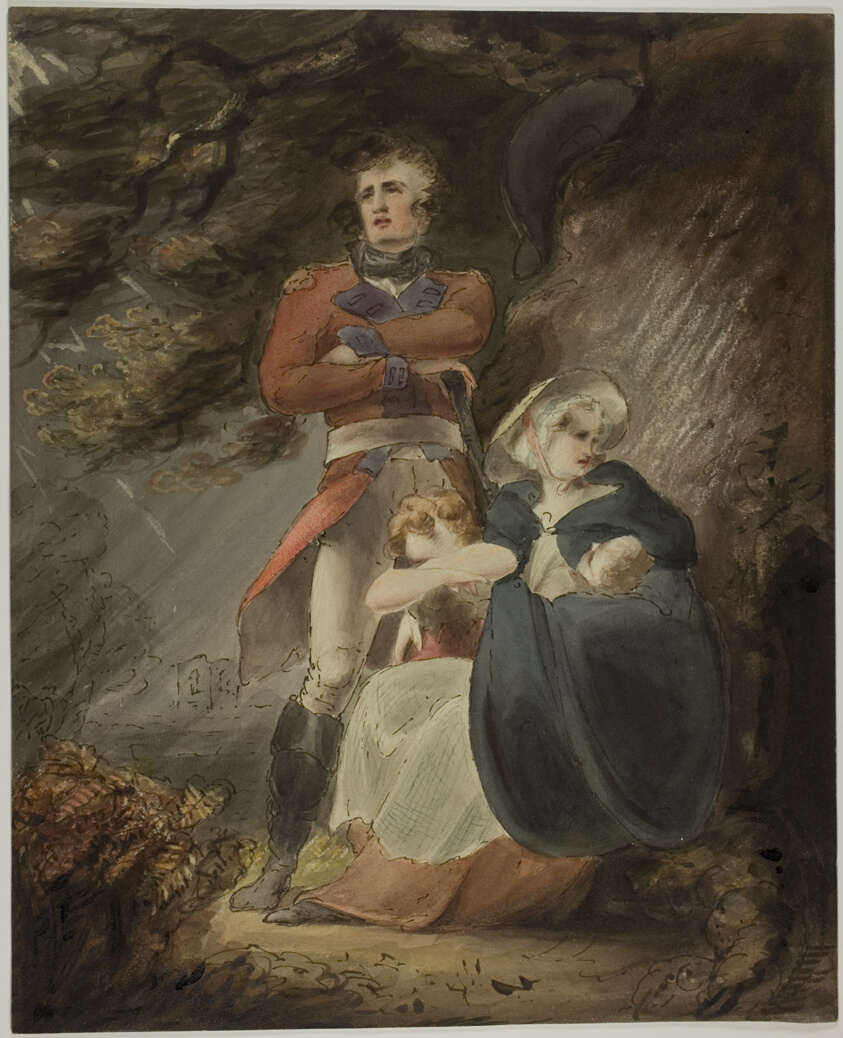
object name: Drawing and Watercolor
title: Officer Seeking Shelter with his Wife and Children from a Storm (recto); Sketch of Castle on Hill (verso)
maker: After Richard Westall; English, 1765-1836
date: c. 1800/20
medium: Pen and brown ink with brush and brown wash and watercolor, scraped to create highlights, heightened with gum varnish (recto), and graphite (verso), on cream wove card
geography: England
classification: watercolor; drawings (visual works); prints and drawing